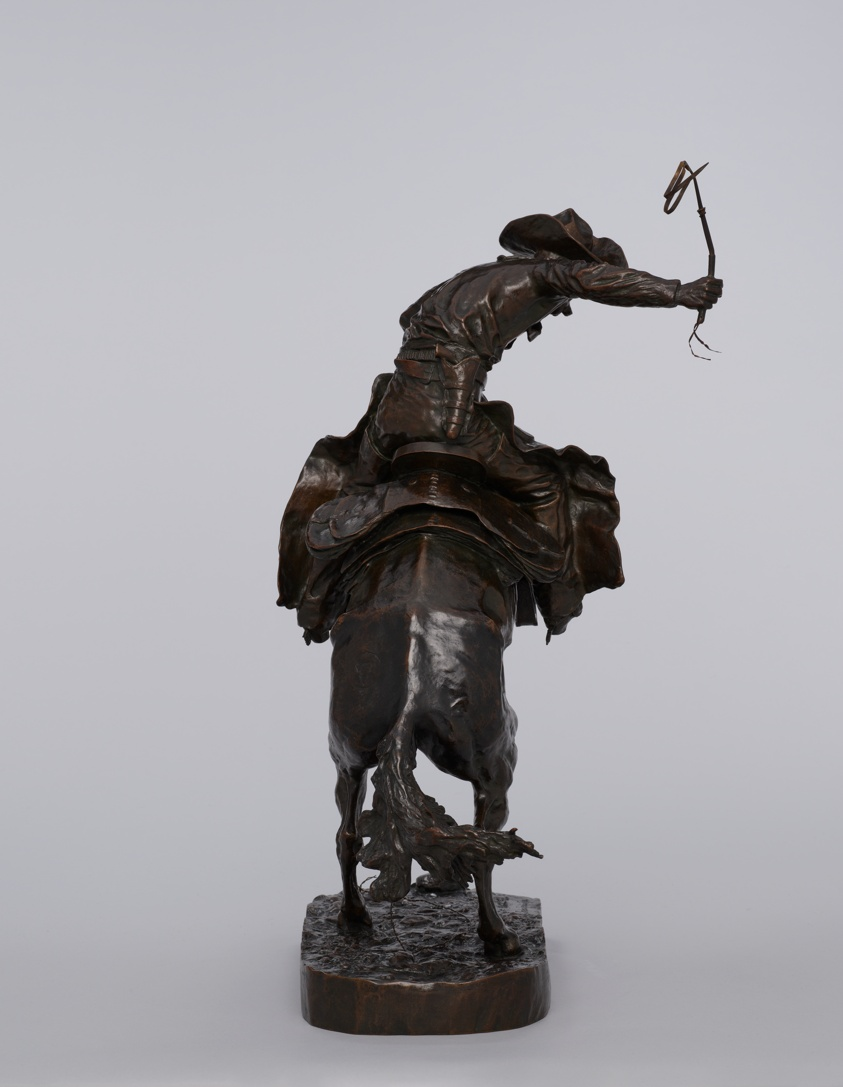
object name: Sculpture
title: The Bronco Buster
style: 19th century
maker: Frederic Remington (American, 1861–1909); Cast by Henry-Bonnard Bronze Co. (American, 19th century)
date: Modeled 1895, cast 1899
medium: Bronze with brown patina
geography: United States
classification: sculpture; american arts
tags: animals, rodeos, cowboys, horses, horseback riding, people, portraits